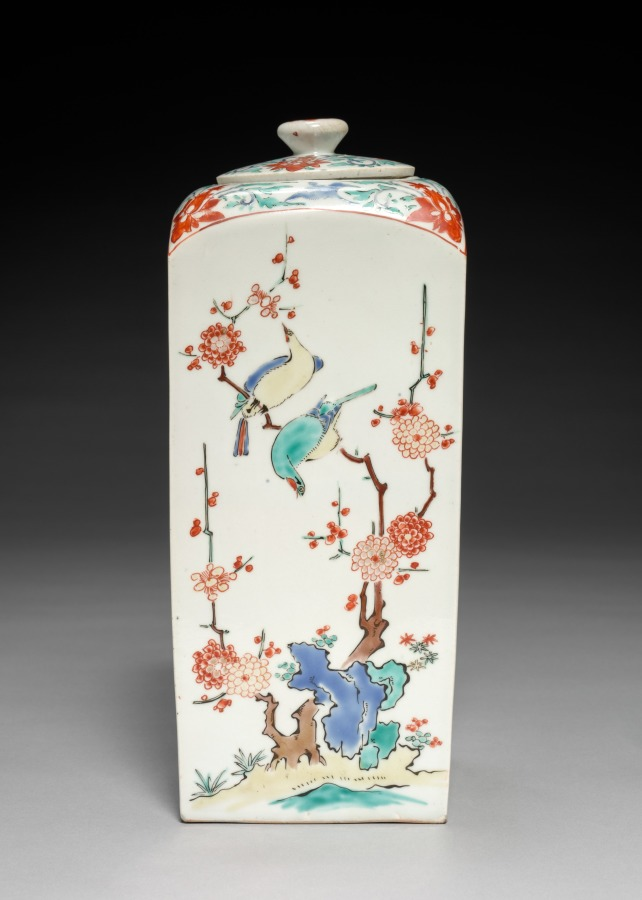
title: Square Jar with Birds and Flowers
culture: Japan, Edo period (1615–1868)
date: late 1600s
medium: Porcelain with overglaze color enamels and gold (Hizen ware, Kakiemon type)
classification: Ceramic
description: This lidded square jar was likely paired with a complementary yet nonidentical mate. The pine tree, plum, and bamboo together form the frequently depicted motif known as the Three Friends of Winter (shōchikubai), so named because of their hardy perseverance in the cold. Each side also features a pair of birds, including cranes on one face and pheasants on another.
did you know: A jar like this was fired at a high temperature, painted with colored enamels, and then fired again at a lower temperature.